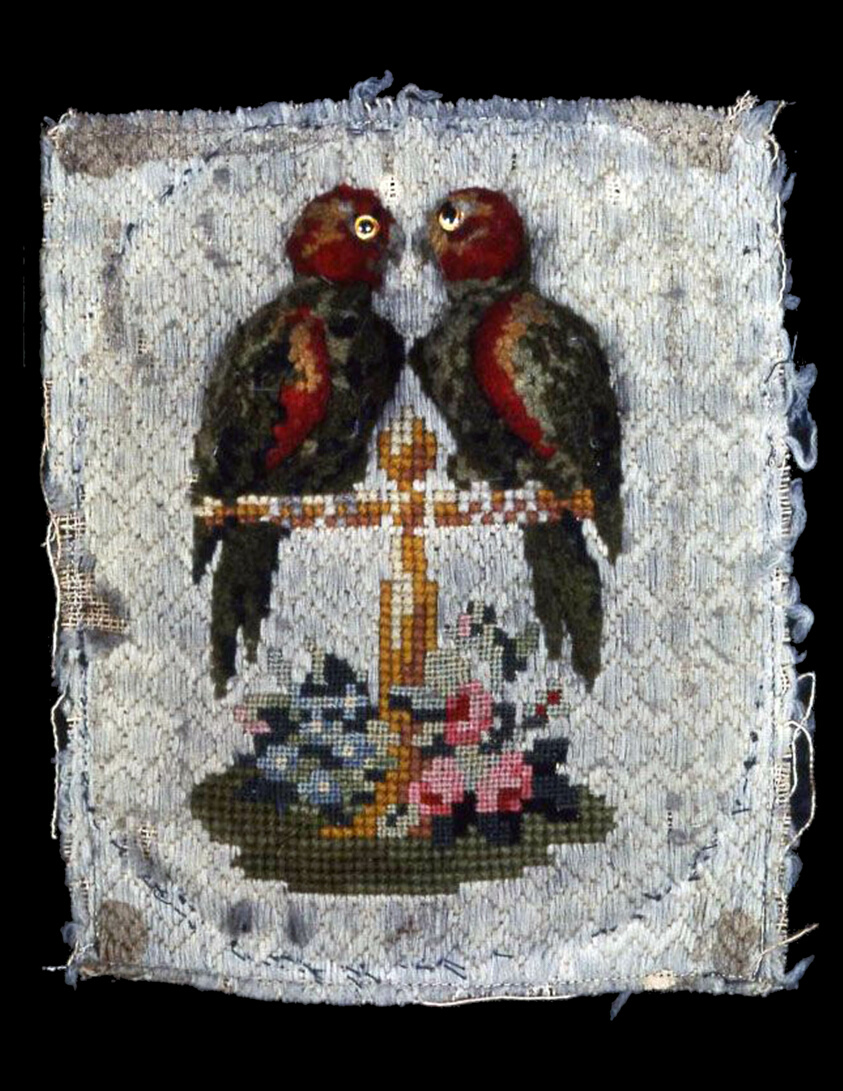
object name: Textile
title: Picture (Needlework)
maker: Europe or United States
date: Probably 19th century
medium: Cotton, plain weave; embroidered with wool yarns in cross, flat, tent and plush stitches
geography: Europe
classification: textile; needlework (visual works)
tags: birds, animals